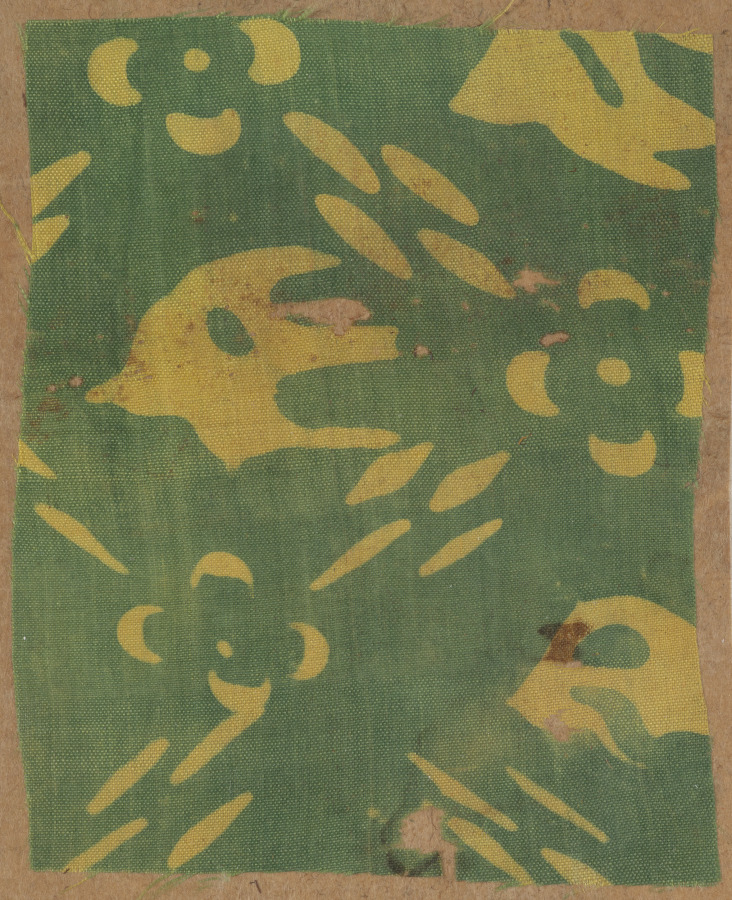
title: Fragment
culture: China or Japan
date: 700s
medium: plain cloth, resist printed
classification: Textile